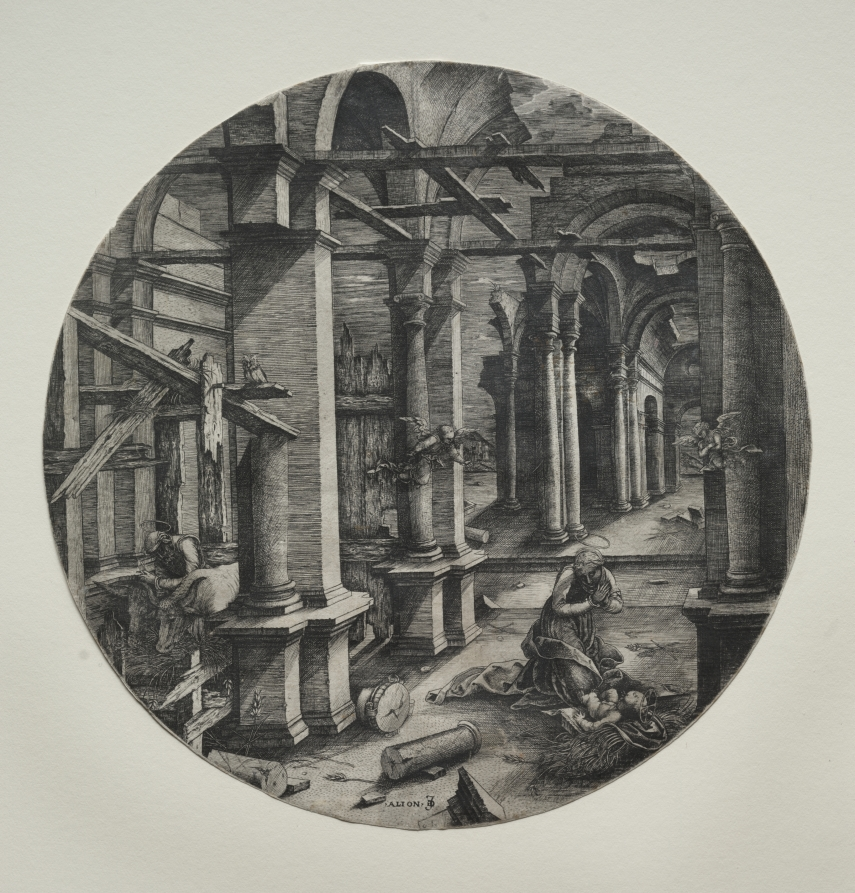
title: The Nativity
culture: France, 16th century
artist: Jean de Gourmont (French)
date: c. 1520–40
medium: engraving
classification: Print